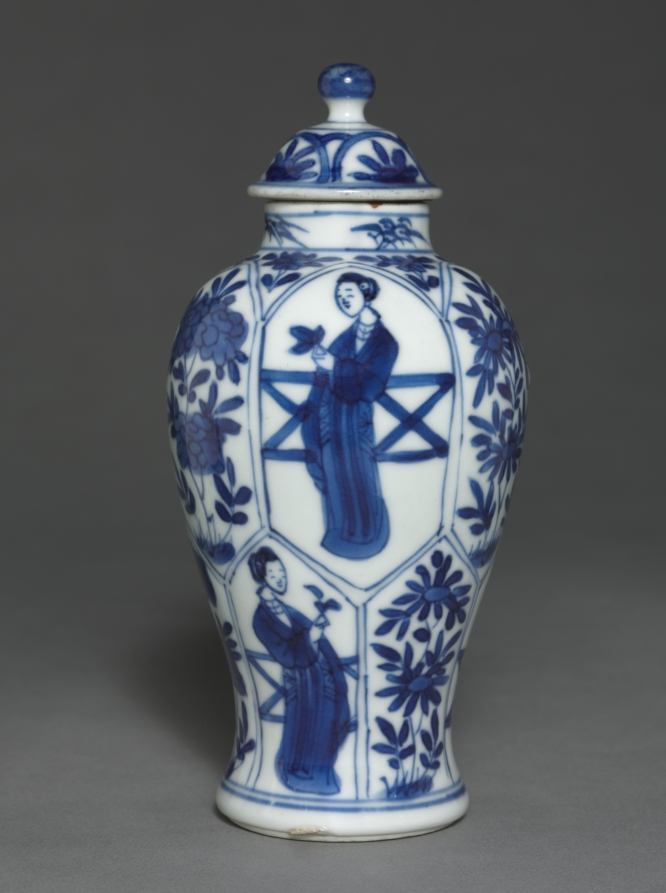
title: Jar with Cover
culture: China, Qing dynasty (1644-1911)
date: 19th Century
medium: porcelain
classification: Ceramic